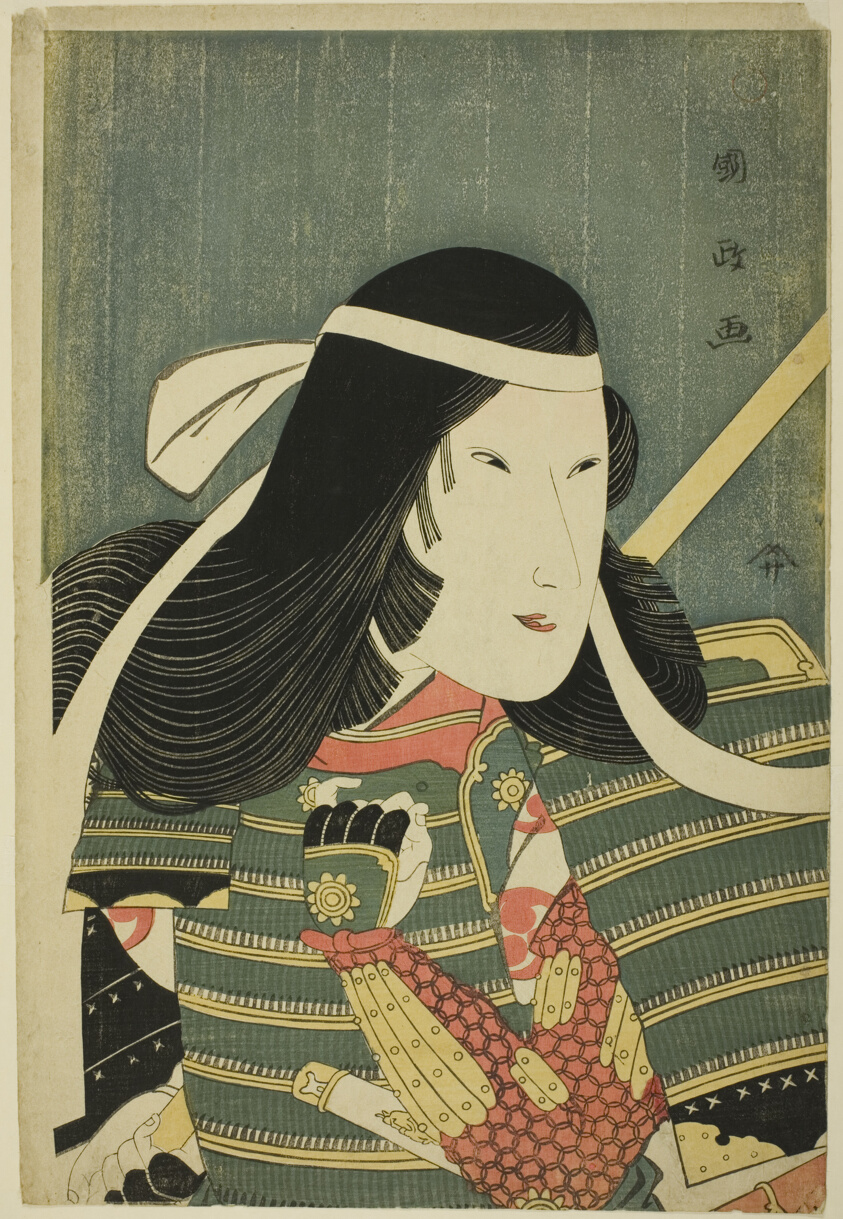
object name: Print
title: Iwai Kumesaburo in the Role of Lady Tomoe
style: Japanese (culture or style)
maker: Utagawa Kunimasa (Japanese, 1773-1810)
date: 1797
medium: Color woodblock print; oban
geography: Japan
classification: woodblock print; print; asian art